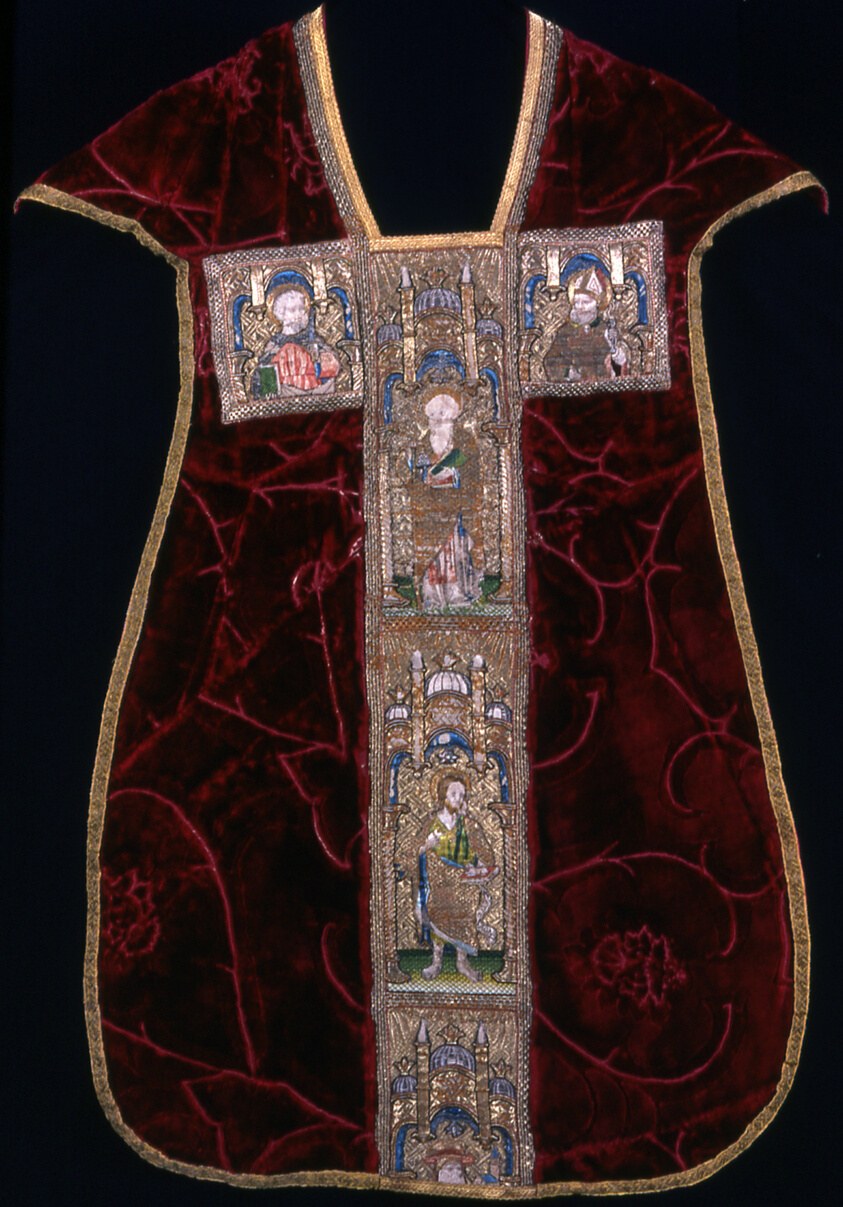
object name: Textile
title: Chasuble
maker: Italy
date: 1425/75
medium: Silk, warp-float faced satin weave with supplementary pile warps forming cut voided pile-on-pile velvet; orphrey: linen, plain weave; embroidered with silk and gilt-metal-strip-wrapped silk in satin, padded satin, and split stitches; couching, padded couching, and laid work; edged with silk, gilt-metal strip, and gilt-metal-strip-wrapped silk woven tape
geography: Italy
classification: textile; liturgical; needlework (visual works); weaving - velvet